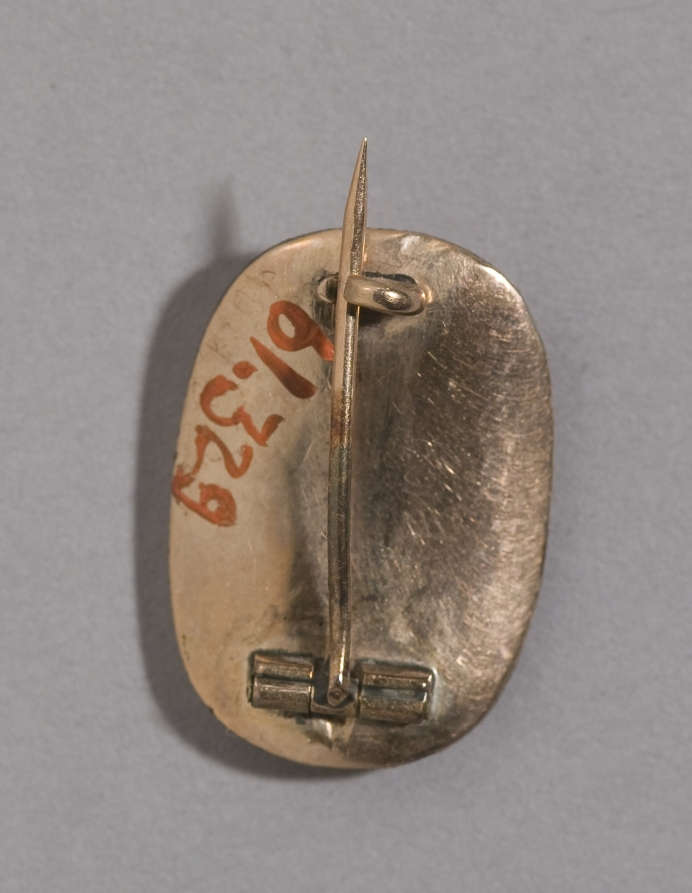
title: Eye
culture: America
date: 1900s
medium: watercolor on ivory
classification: Portrait Miniature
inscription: small inscription on verso: "E103 c51(?)"